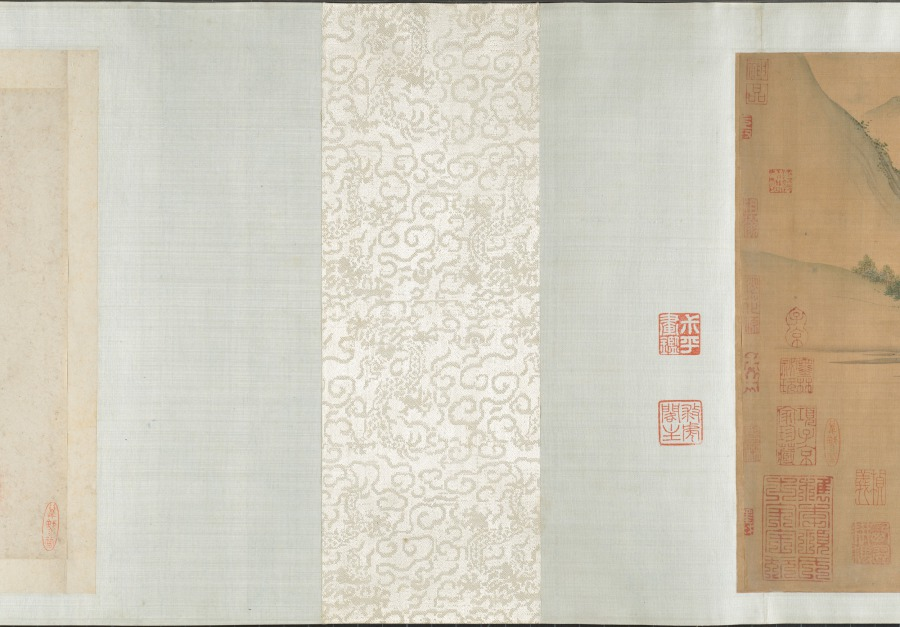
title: Garden for Solitary Enjoyment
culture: China, Ming dynasty (1368–1644)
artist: Qiu Ying (Chinese, 1494–1552)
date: 1515–52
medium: Handscroll; ink and light color on silk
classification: Painting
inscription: Accompanying text of an essay together with seven poems of Sima Guang (1019–1086) and one poem of Su Shi (1037–1101) written by Wen Zhengming (1470–1559) in 1558.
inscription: 2 colophons and 82 seals: 4 seals of Wen Zhengming 文徵明 (1470–1559); 59 seals of Xiang Yuanbian 項元汴 (1525–1590); 1 colophon, dated 1644, and 7 seals of Xiang Yukui 項禹揆 (c. late 1500s–1659); 1 colophon, dated 1880, and 2 seals of Weng Tonghe 翁同龢 (1830–1904); 2 seals of Ch'eng Chen-i (19th c.); 1 seal of Han Ch'ung (19th c.); 4 seals of Wan-go H. C. Weng 翁萬戈 (1918–2020); 3 seals unidentified.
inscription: Colophon by Xiang Yukui 項禹揆 (c. late 1500s–1659): The painting of The Garden for Self-enjoyment on the right by Shih-chou, Mr. Qiu [Qiu Ying] is in the style of Li Lung-mien. Its mood is peaceful, as if meeting the ancient gentlemen face to face among the brushes and silk; it lifts one above the sordid bustle of life. Formerly, my late father handed me this scroll which had only the painting without the written essay. I considered asking a good calligrapher to write the essay to add to it but was afraid that the quality of the writing would not match the painting. Several years later, I saw at a friend's house this essay and poems (of Ssu-ma Kuang] written by Hengshan [Wen Zhengming], once owned by my grandfather; so I spared no expense to obtain it. I rejoiced at this and said: "The divine swords are finally united. How things are pre-destined!" Now my friend Chang Kung-chao's technique for mounting [painting and calligraphy] is excellent. Therefore by daring to take them out and join them together, I can preserve this beautiful story of singular reunion. Xiang Yukui recorded at Hai-yeh-t'ang [hall] two days before New Year's Eve in the jiasheng year of the Chongzhen era [1644]. trans. LYSL/HK/WKH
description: Garden of Solitary Enjoyment refers to a site built in 1073 by the statesman Sima Guang (1019–1086) after he had retired to Luoyang, Henan province. Every spring, visitors would flock to his garden. Each of its seven structures references a historic figure. Sima wrote: I channel streams [like Du Mu], to water flowers [like Bai Juyi], or trim bamboo [like Wang Huizhi]. . . . I know of no joy between heaven and earth that could take its place. Qiu Ying’s painting, created after an 11th-century version of the same theme, must have appealed to garden owners of the Ming dynasty, since it became the template for numerous Suzhou workshop copies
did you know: Sima Guang completed his monumental survey of Chinese history, Zizhi tongjian, in the garden depicted in this painting.